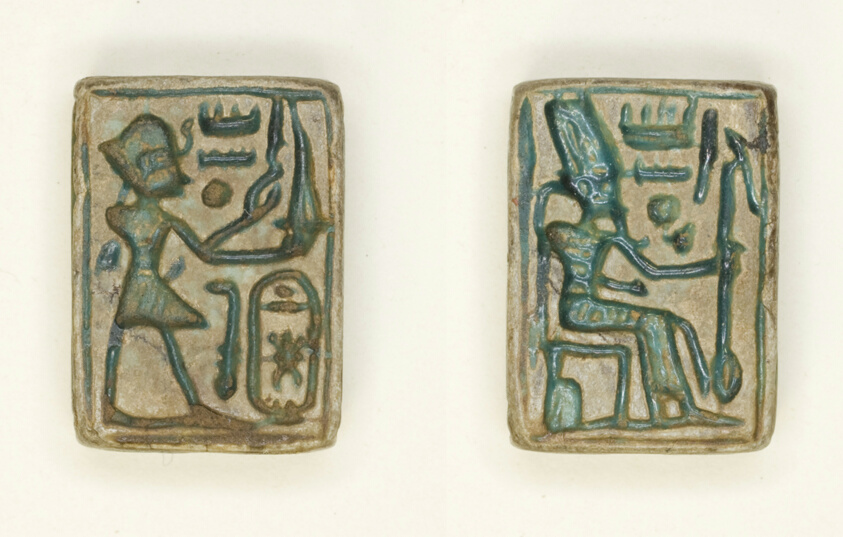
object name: Costume and Accessories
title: Plaque: Amenhotep II Offers Incense/Amun-Re Seated on Throne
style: new kingdom, ancient, eighteenth dynasty, egyptian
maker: Egyptian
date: New Kingdom, Dynasty 18, reign of Amenhotep II (about 1427–1400 BCE)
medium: Steatite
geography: Egypt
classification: amulet; ancient art; costume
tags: pharaohs, offering, kings, king, Hieroglyphs, gods (deities), deities